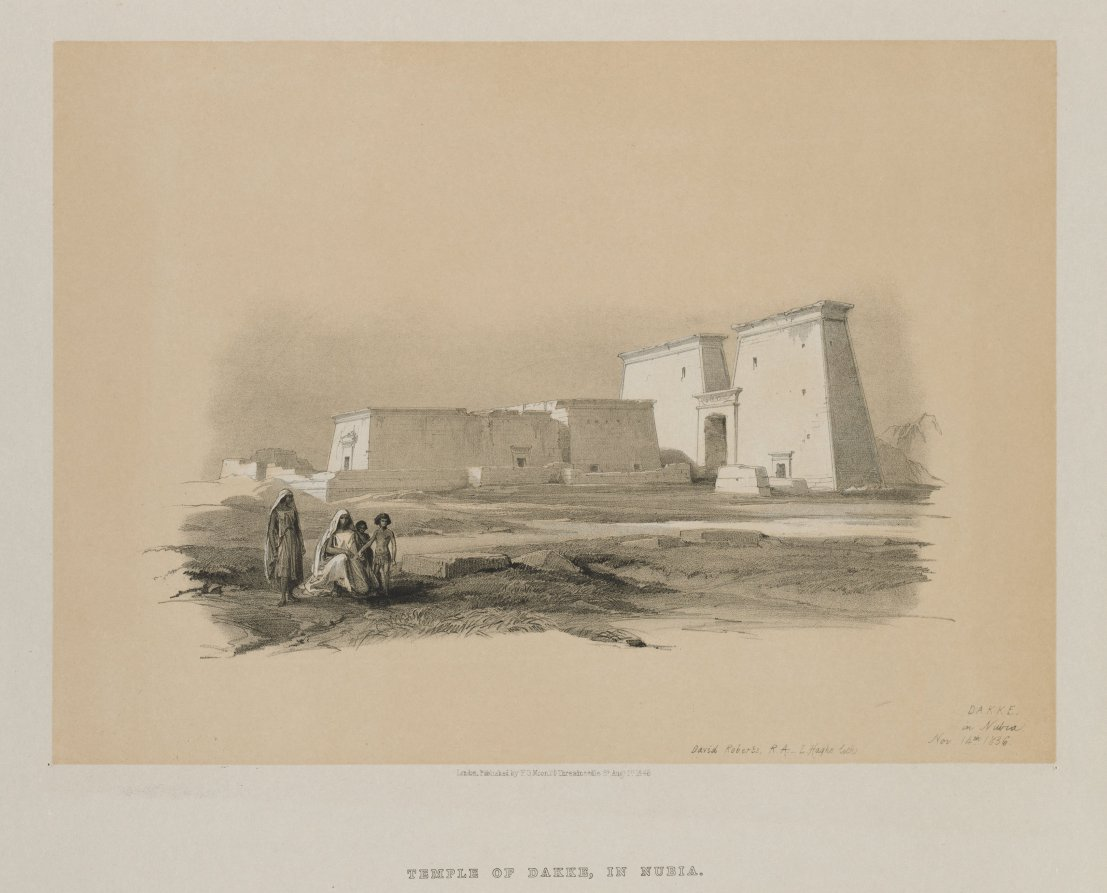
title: Egypt and Nubia, Volume I: Dakke, in Nubia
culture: England, 19th century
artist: Louis Haghe (British, 1806–1885)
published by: F. G. Moon, 20 Threadneedle Street, London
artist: after David Roberts (Scottish, 1796–1864)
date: 1846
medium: color lithograph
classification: Print